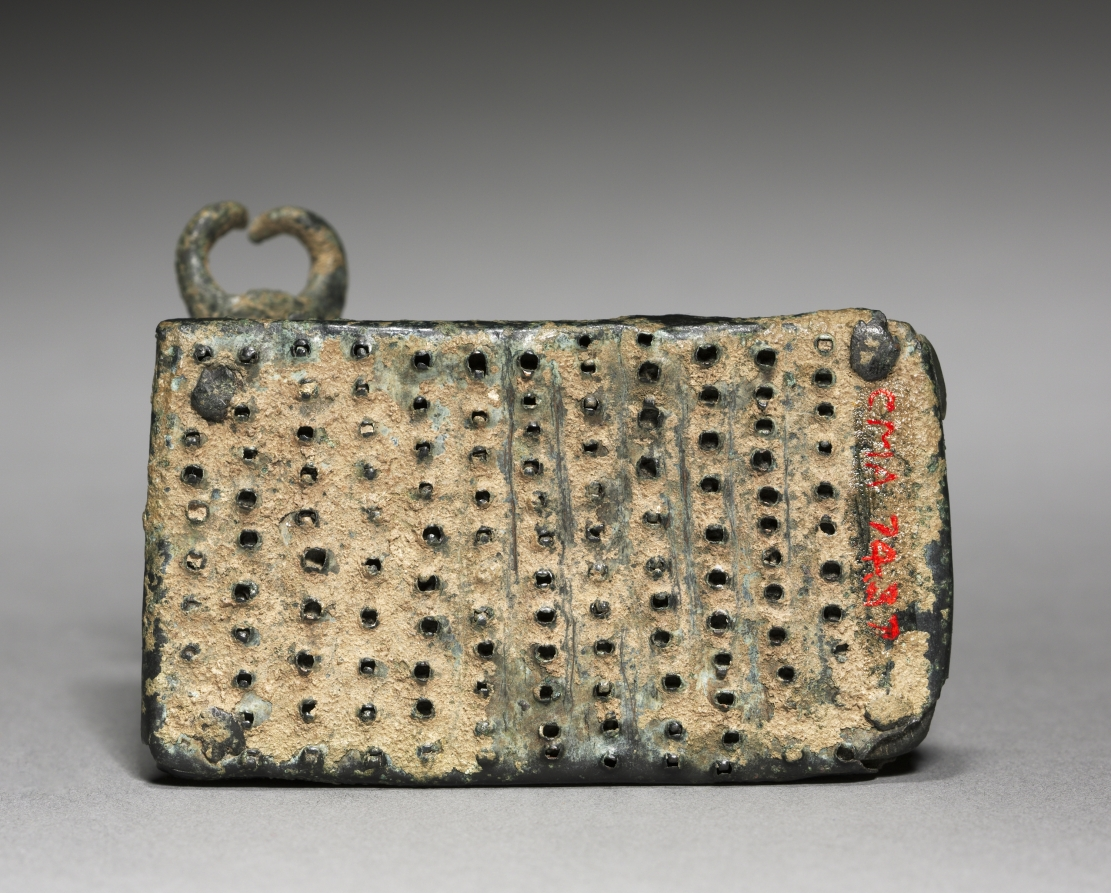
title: Recumbent Animal on Grater or Scraper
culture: Greece or Anatolia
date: 700–500 BCE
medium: bronze with iron grating plate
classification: Sculpture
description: An emaciated bull (or perhaps goat) lying on the ground, his legs tucked under in a resting position, may constitute a handle for this unusual object—likely a grater or scraper, judging from the perforated metal plate on its underside. The anatomically curious ridges across the neck and torso of the animal, as well as the large horned head turned perpendicular to the body, may have helped the owner grip the object while in use.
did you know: The exact use of this enigmatic object remains unknown.